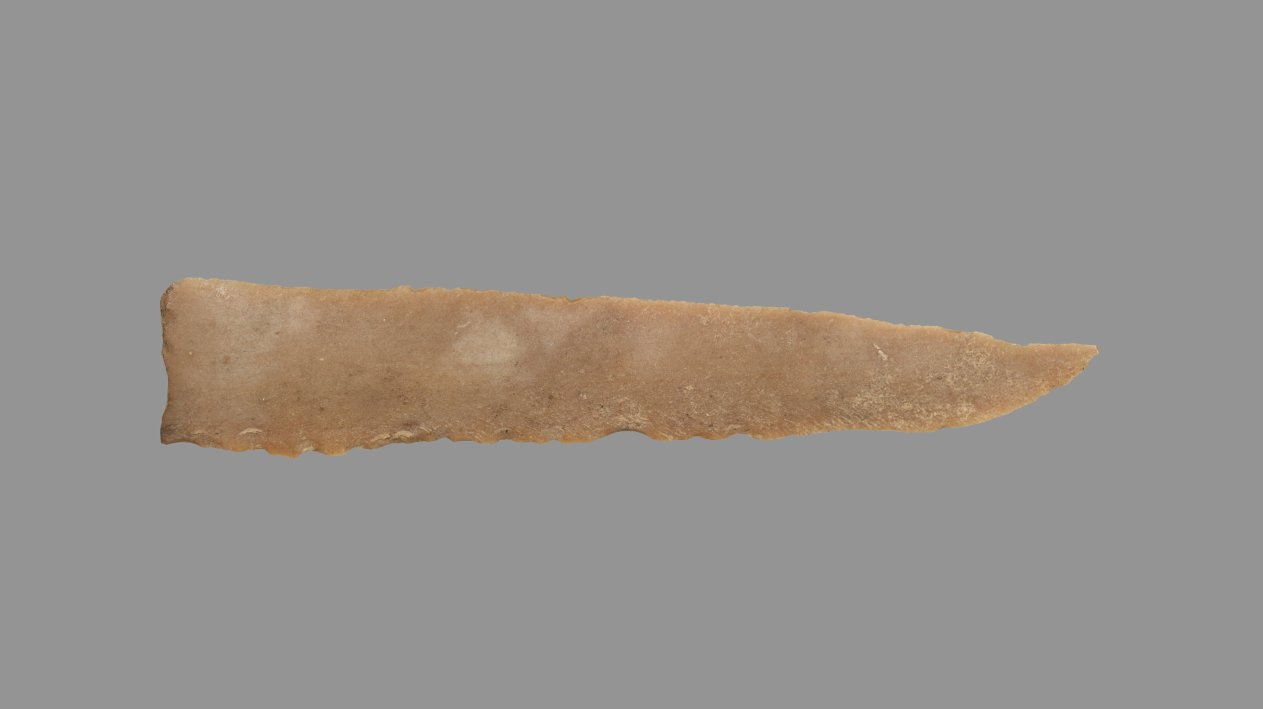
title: Sickle Blade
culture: Egypt, Middle Kingdom (2040–1648 BCE), Dynasty 12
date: 1980–1801 BCE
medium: flint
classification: Implements